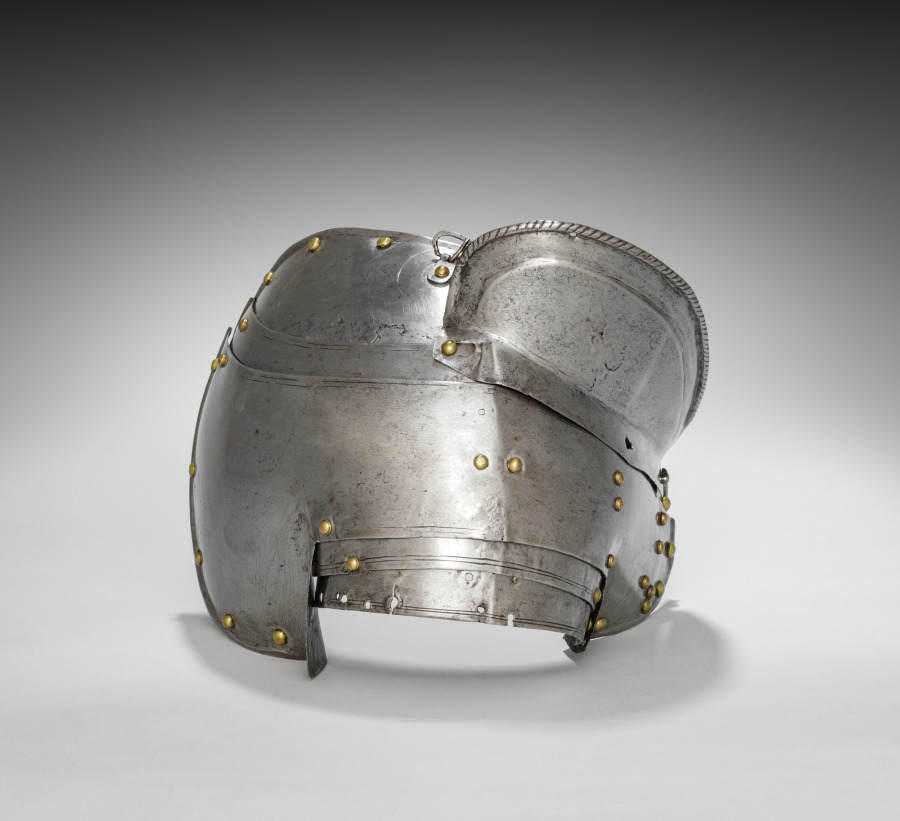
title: Pauldron (proper right) and Gardbrace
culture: South Germany, 16th century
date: c. 1560–1580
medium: steel, leather straps, brass rivets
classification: Arms and Armor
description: This armor was developed for the joust--a sporting combat between two mounted contestants. Although all of the elements of this armor date from the same period, they are not all from the same suit. This armor is thus called "composed." It also shows the asymmetry of jousting armor. The participants rode along a wall-like barrier known as a "tilt" with their left sides facing one another. Consequently, armor on that side of the body had to be thicker. Note the large plate (grandguard) over the left shoulder for extra protection. Also, the breathing holes in the helmet were placed on the right side (farthest from an opponent's lance) to avoid injuries from splinters. The bracket attached to the right breastplate is called the lance-rest, a shock-absorbing support designed to accommodate the lance when "couched" under the right armpit.